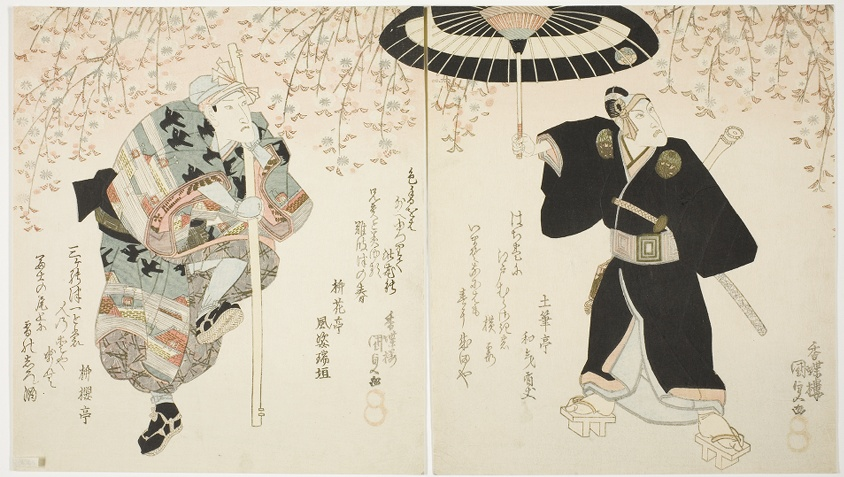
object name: Print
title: The actors Ichikawa Danjuro VII as Sukeroku (R) and Onoe Kikugoro III as the white sake peddler Shinbei (L) in the play "Yukari no Edo-zakura"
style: Japanese (culture or style)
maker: Utagawa Kunisada I (Toyokuni III) (Japanese, 1786-1864)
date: c. 1823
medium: Color woodblock print; two sheets of a shikishiban triptych, surimono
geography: Japan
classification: woodblock print; print; asian art